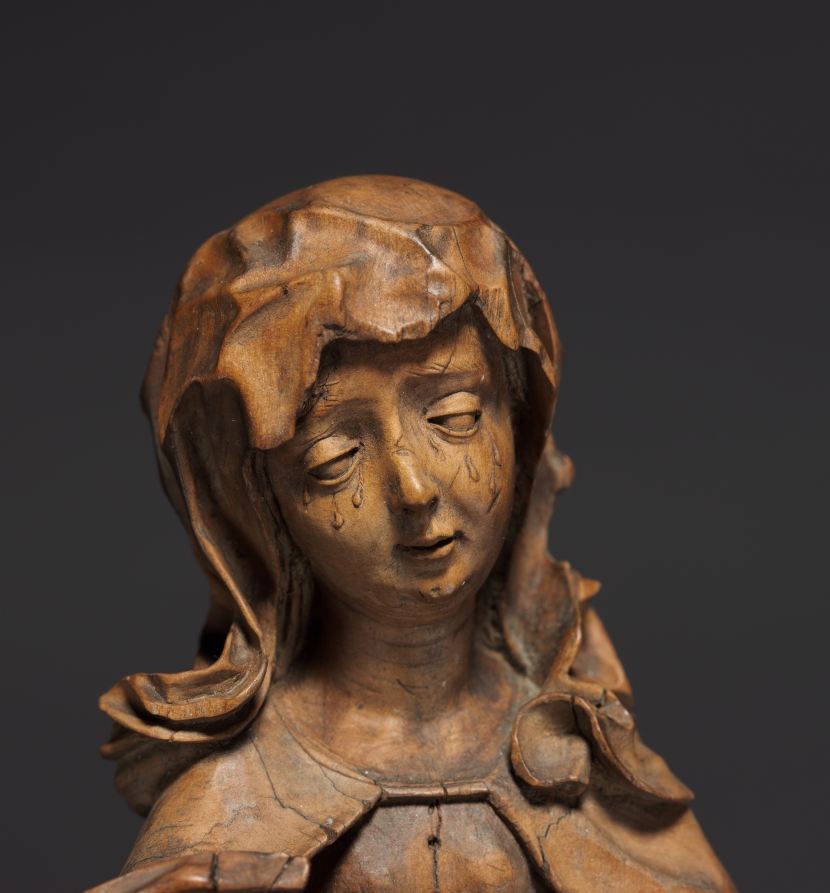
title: Mourning Virgin from a Crucifixion Group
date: about 1620/40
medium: pearwood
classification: Sculpture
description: This statuette once formed part of a Crucifixion group intended for a domestic shrine or chapel. Such ensembles were not only used for private devotion and meditation, but were also collected as works of art. This work was long attributed to the Nuremberg artist Veit Stoss. In fact, the carver imitated forms from his repertoire. However, the concave folds do not occur before 1600. The sculpture was created at a time when the appreciation for Albrecht Dürer, the most famous German painter of his time, was also experiencing a renaissance.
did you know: Looking closely, you can see that the sculptor carved tears under Mary's eyes. They show her pain over Christ hanging on the cross.